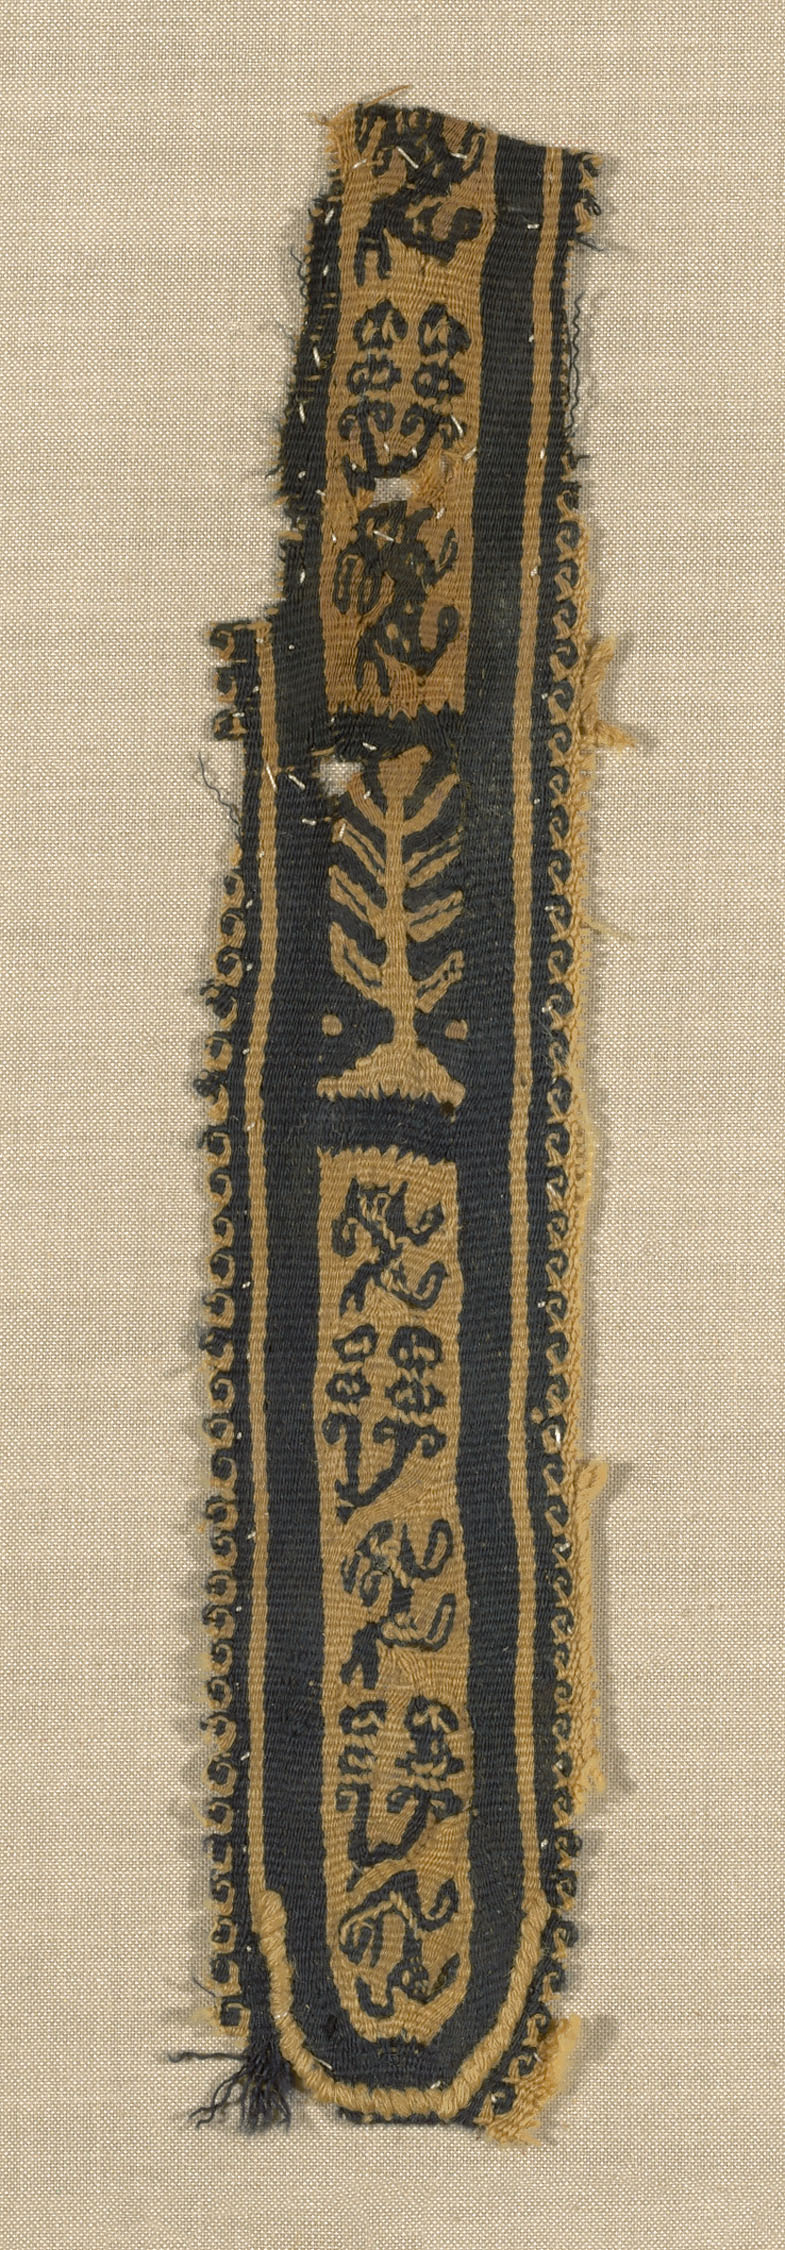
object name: Textile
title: Band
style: roman period (egyptian)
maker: Coptic (Egypt)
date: Roman period (30 B.C.– 641 A.D.), 5th century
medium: Wool, tapestry weave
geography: Egypt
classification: textile; weaving